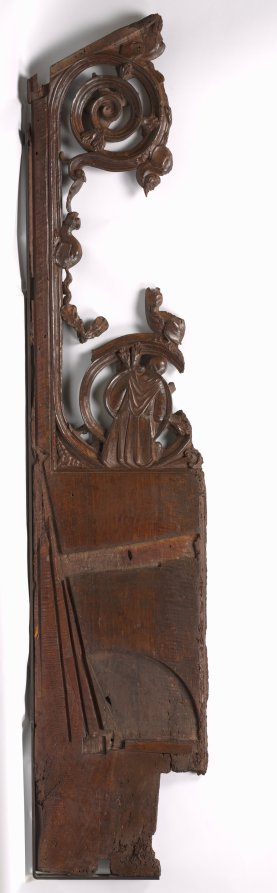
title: Panel from a Choir Stall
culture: Spain, Catalonia, Monastery of Pedralbes, 14th century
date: c. 1330–1340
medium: walnut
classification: Furniture and woodwork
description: The large panel shown here was probably the end panel of a stall that faced another across the choir of a Gothic church. The panel is carved with the figure of St. Francis of Assisi kneeling in prayer and receiving the stigmata. Two standing figures also appear on this panel: a nun at the left (perhaps St. Claire) and a female martyr at the right. Below is St. Michael and the dragon.